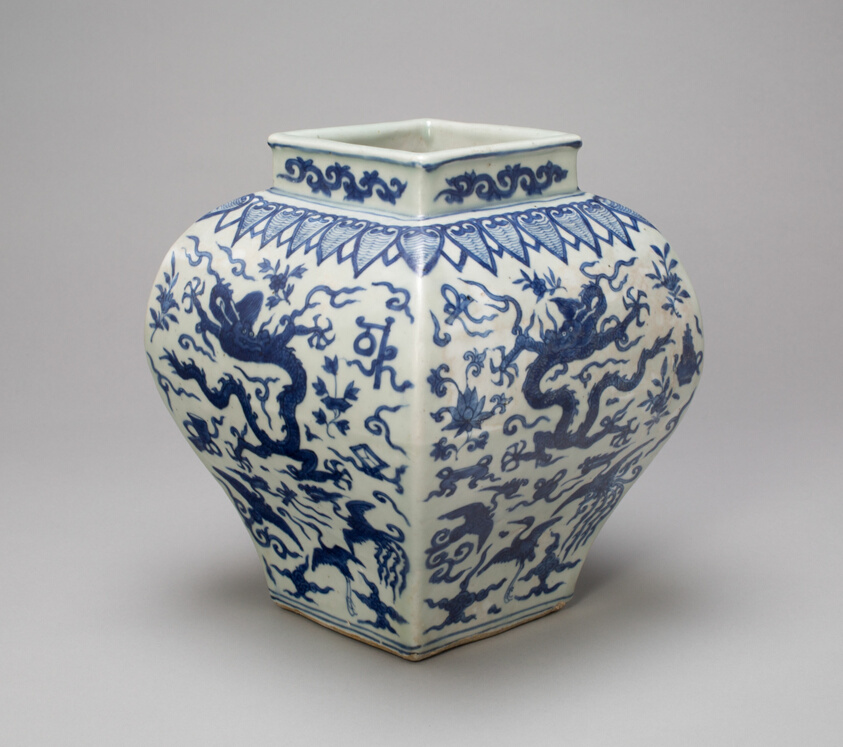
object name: Vessel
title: Square-Sided Jar with Dragons, Phoenixes, Cranes, and Auspicious Symbols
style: Chinese (culture or style)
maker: China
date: Ming dynasty (1368–1644), Wanli reign mark and period (1573–1620)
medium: Porcelain painted in underglaze blue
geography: China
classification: porcelain; ceramics; asian art; vessel